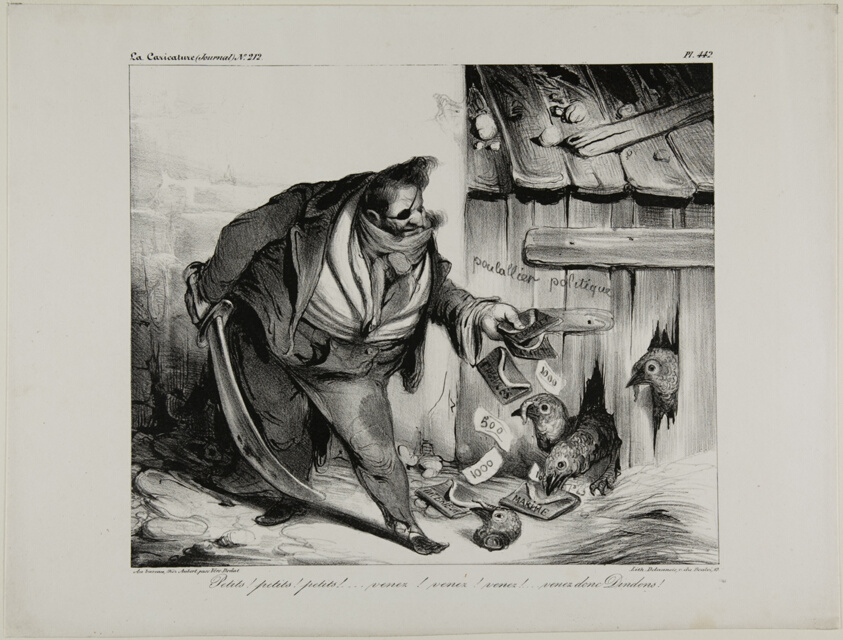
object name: Print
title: Come Here Little Chick, Chick..... Chick... Chick, Come Little Turkeys, plate 442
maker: Honoré Victorin Daumier; French, 1808-1879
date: 1834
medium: Lithograph in black on white wove paper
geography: France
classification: lithograph; print; prints and drawing